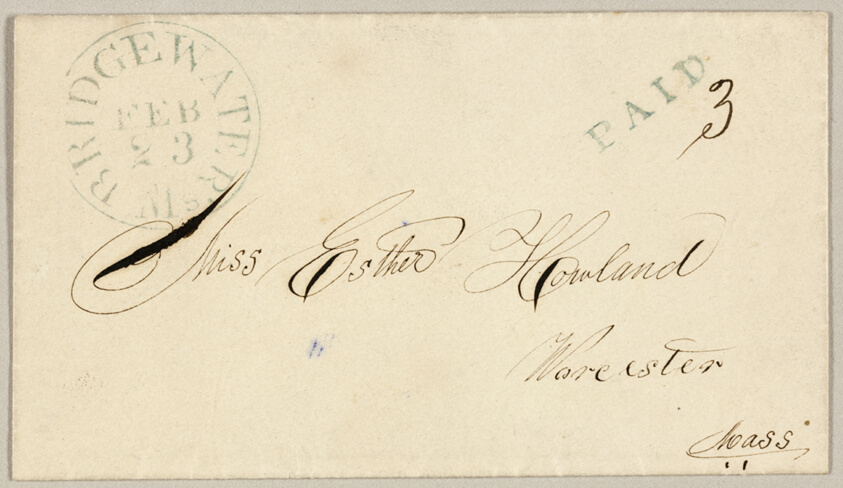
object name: Drawing and Watercolor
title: Valentine envelope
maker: Unknown Artist; American, 19th century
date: 1860/69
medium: Pen and black ink on ivory wove paper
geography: United States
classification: valentine; prints and drawing; paper